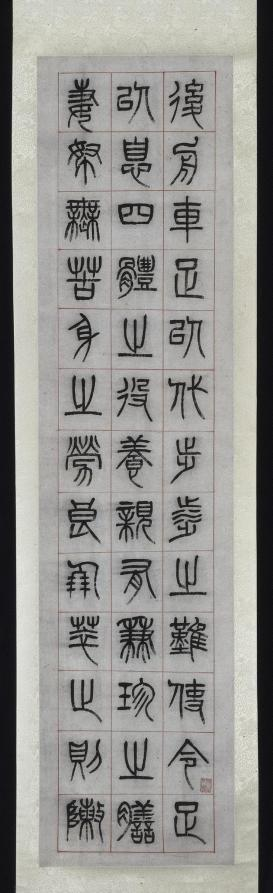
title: On Happiness, Calligraphy in Seal Script Style (zhuanshu)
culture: China, Changsu, Qing dynasty (1644-1911)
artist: Yang Yisun (Chinese, 1813–1881)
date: 1871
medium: hanging scoll, ink on paper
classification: Painting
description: Yang Yisun transcribed this ancient text on six narrow scrolls, starting at the top right and ending at the bottom left. Yang emphasizes the text’s historic nature by using the seal script style found on stone steles and bronze vessels. On Happiness features reflections of a scholar on a leisurely life in the countryside, composed by Han dynasty official Zhongchang Tong, who died the year the Han dynasty collapsed (AD 220). The idyllic life described in the text may bean evocation of the past in a time of national crisis. A decade before Yang wrote these scrolls, Anglo-French forces had looted and burned the Summer Palace in Beijing. At the same time, the domestic Taiping rebellion (1850–64), led by a religious fanatic to overthrow the Qing government, had devastated Yang’s homeland, the Jiangnan region, with an estimated 20 million lives lost.